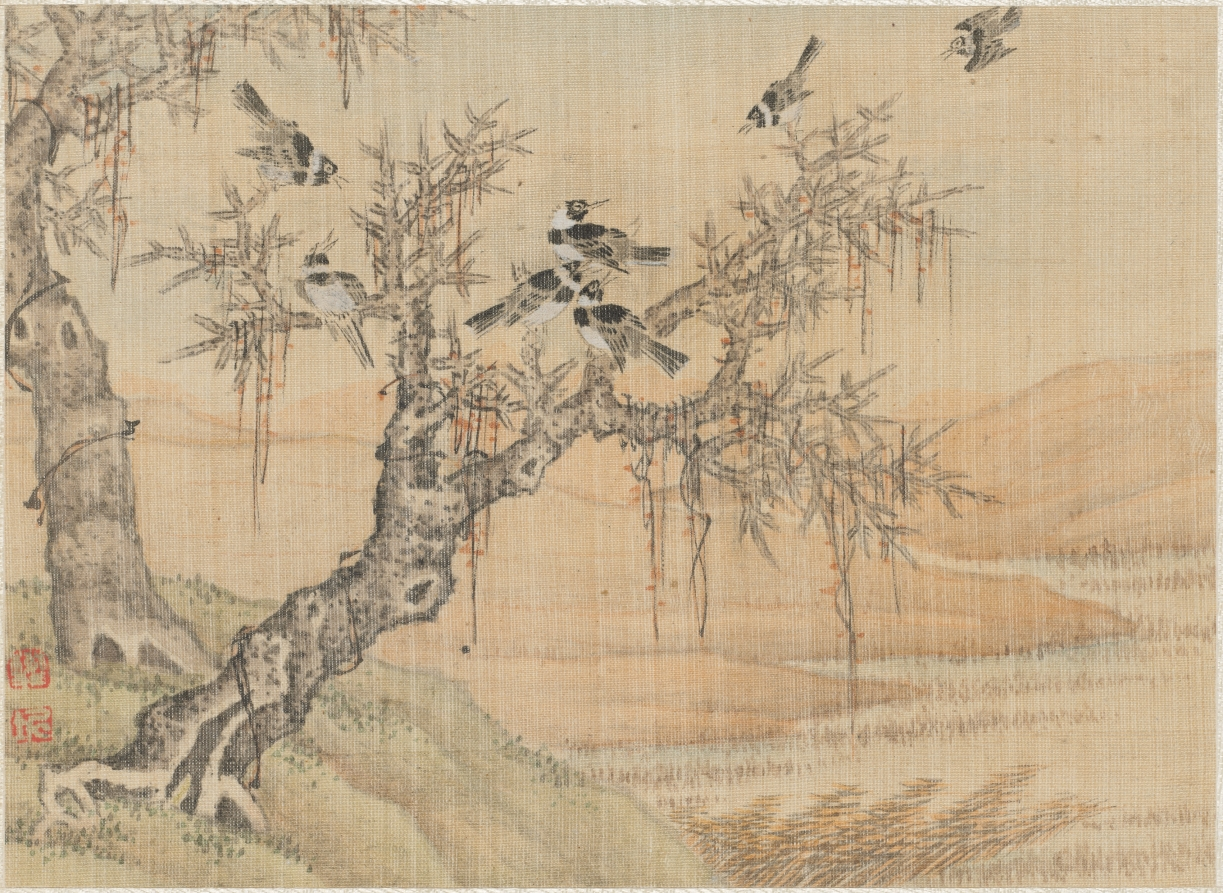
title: Album of Miscellaneous Subjects, Leaf 9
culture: China, Qing dynasty (1644-1911)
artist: Fan Qi (Chinese, 1616–after 1694)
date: early 1650s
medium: album leaf, ink and color on silk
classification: Painting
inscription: Artist seal: Fan Qi 樊圻. Poem by Zhou Yi 周儀 (mid 17th century–about 1705): Ancient trees share the slanting rays of the setting sun/ Chilly ravens hover round their branches/ The leader of the flock thinks this is a good place to rest,/ Evening being the time for returning./ This flock is the so-called a filial crow,/ Who, in disgorging their food [to feed their young], have compassionate hearts,/ Were the people in the world all like this,/ Fine talent would be everywhere.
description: Leaf 9 Zhou Yi's colophon reads: Ancient trees share the slanting rays of the setting sun. Chilly ravens hover round their branches. The leader of the flock thinks this a good place to rest, Evening being the time for returning. This flock is the so-called filial crow, Who, in disgorging their own food [to feed the young], have compassionate hearts. Were the people in the world all like this, Fine talent would be everywhere.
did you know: The winter landscape turns ocher at dusk, and the birds roost for the night.